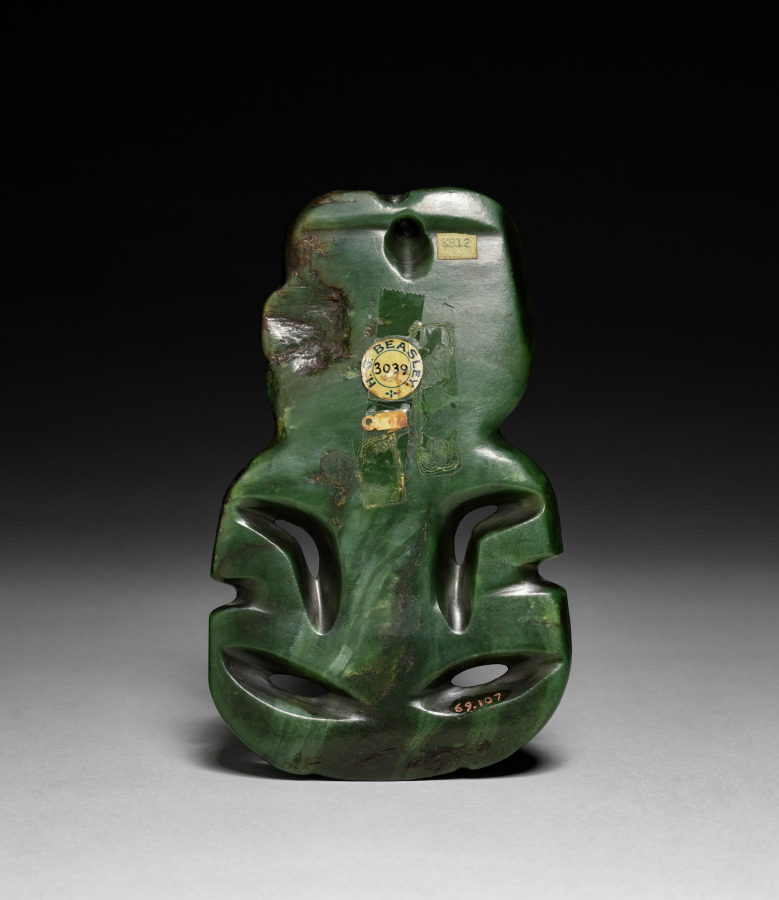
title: Neck Pendant (Hei-tiki)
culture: Pacific Islands, Polynesia, New Zealand, Māori people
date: 1800s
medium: Greenstone (pounamu) (nephrite?)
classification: Sculpture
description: Among the Māori, leaders are hereditary and imbued with mana, power and prestige that can be embodied and passed down in the artworks associated with them. Hei-tiki are among these treasured, mana-charged heirlooms, which connect the living to ancestors of the islands’ pre-European past. They may represent Hine-te-Iwaiwa, a legendary ancestress who is the exemplar of Māori womanhood and the patron of childbirth.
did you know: Hei-tiki may represent Hine-te-Iwaiwa, a legendary ancestress who is the exemplar of Māori womanhood.